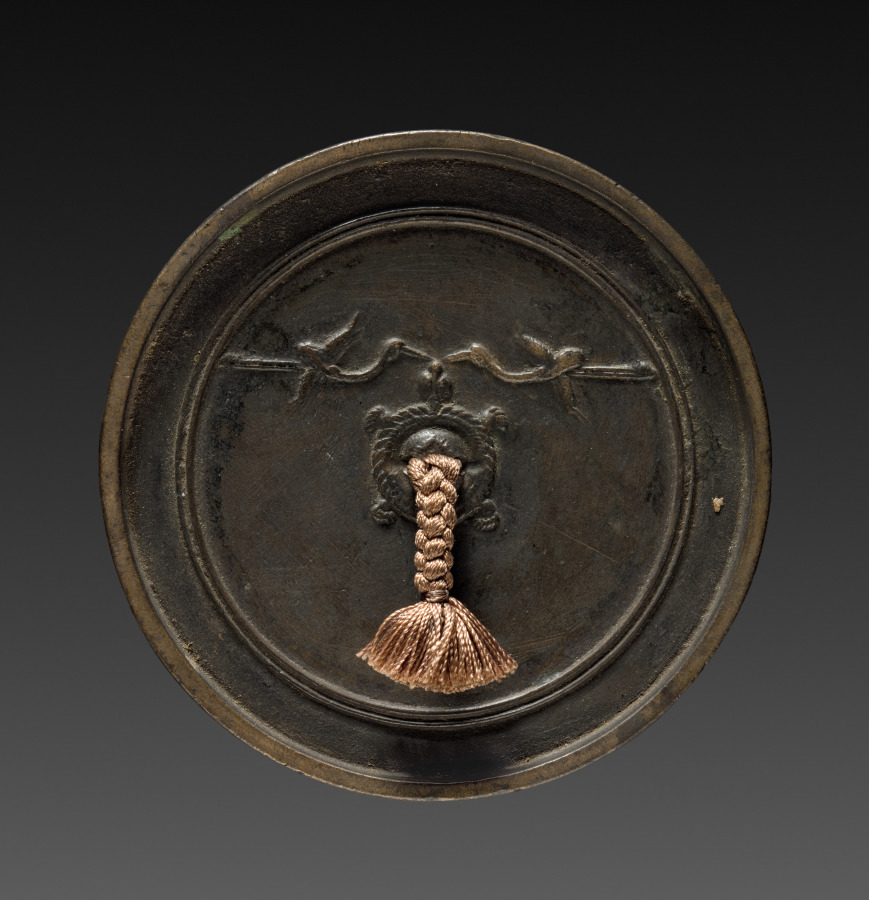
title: Mirror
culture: Japan, Edo period (1615–1868)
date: 1615–1868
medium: bronze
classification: Metalwork